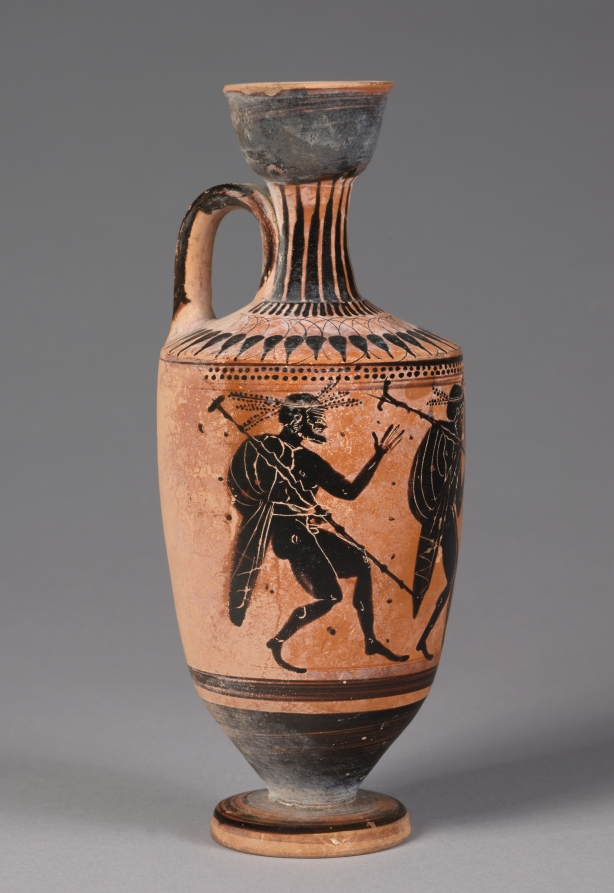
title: Black-Figure Lekythos (Oil Vessel): Komos (Revel)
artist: attributed to The Group of Cleveland 16.1061 (name vase)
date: c. 500 BCE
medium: ceramic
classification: Ceramic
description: Three bearded figures dance or cavort on this oil vessel, each wreathed, loosely draped with a cloak, and holding a staff. The central figure also holds a drinking horn, though all may well have been drinking. The painter of this vase is unknown, but the style of drawing has been linked to a similar vessel now in Syracuse, Sicily.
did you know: The small black marks between and around the figures are mock letters, perhaps indicating illiteracy.